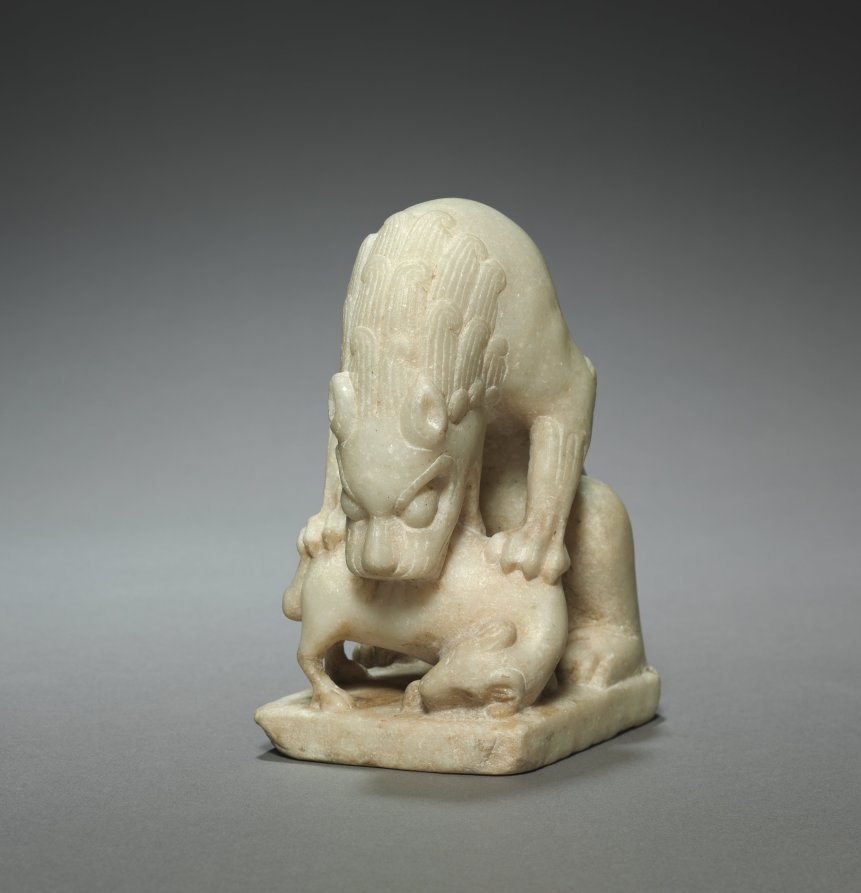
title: Lion Devouring a Lamb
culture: North China, Tang dynasty (618-907)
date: early 700s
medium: white marble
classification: Sculpture